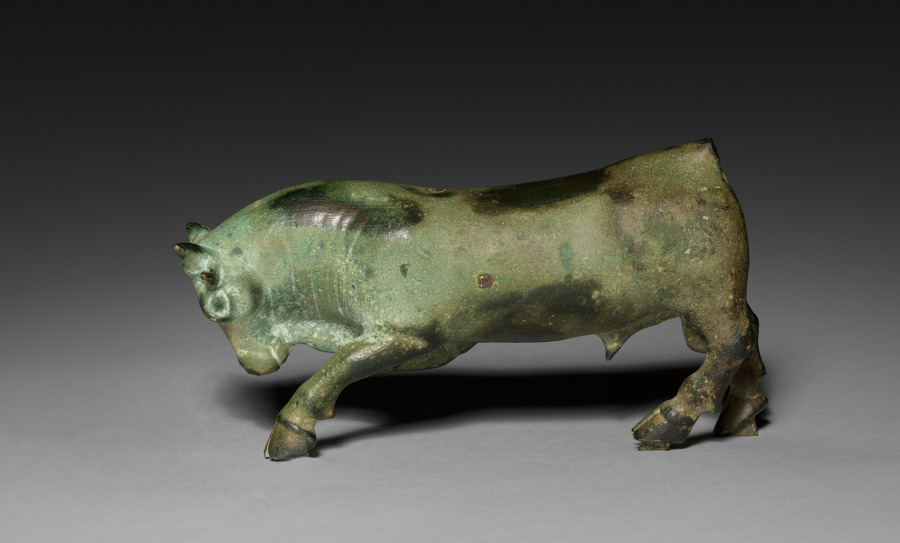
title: Pawing Bull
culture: South Italy, Lucania, Greek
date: 500–475 BCE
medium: bronze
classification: Sculpture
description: With its head slightly lowered and right foreleg raised in a pawing motion, this robust bull seems poised for action. The pose closely resembles that of bulls on coins minted at Thurii, a Greek colony in South Italy, but the statuette seems earlier in date and could have other associations. Perhaps the bull once carried the princess Europa, for example, or battled a lion or a hero. Alternatively, it may have stood alone as a small-scale offering, representing the actual bulls sometimes sacrificed to deities.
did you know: This solid-cast bronze bull is nearly intact, missing only its tail.